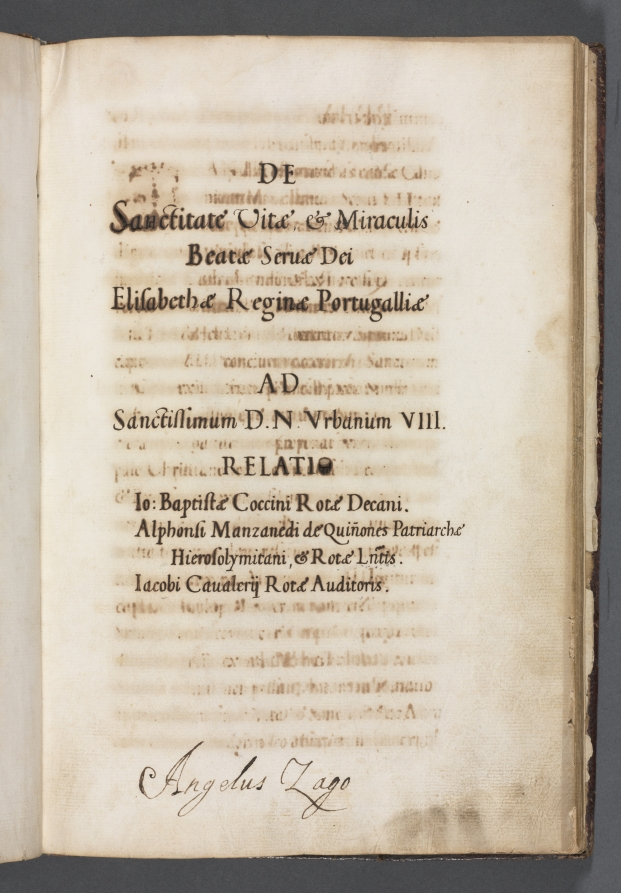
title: Relatio on Saint Elizabeth of Portugal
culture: Italy, Rome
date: c. 1625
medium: manuscript on paper bound in leather with gilt decoration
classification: Manuscript